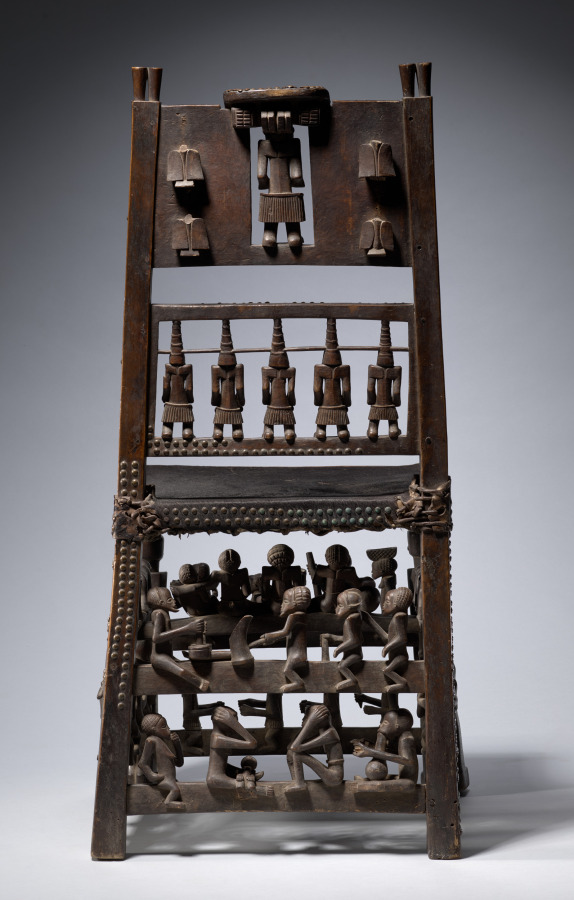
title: Ceremonial Chair or Throne (citwamo ca mangu)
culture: Africa, Central Africa, Angola, Chokwe-style carver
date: 1800s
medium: Wood, upholstery studs, leather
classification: Furniture and woodwork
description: This citwamo ca mangu chair bears over 40 sculpted figures arranged in complex compositions across the chair’s top rail (back), stretchers (rungs), and legs; all symbolize the power of Chokwe supreme chiefs. Such chairs typically bear a dozen or fewer figures. Scenes of royal life and power wrap around the seat, reinforcing how the chief and his family are at the center of their polity and its business.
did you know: Starting around the 1500s, Chokwe and other African leaders and traders received fine chairs as gifts from Portuguese traders. Chokwe leaders adapted this symbol of power as their own, using it in tandem with stools, an earlier kind of prestige seat.